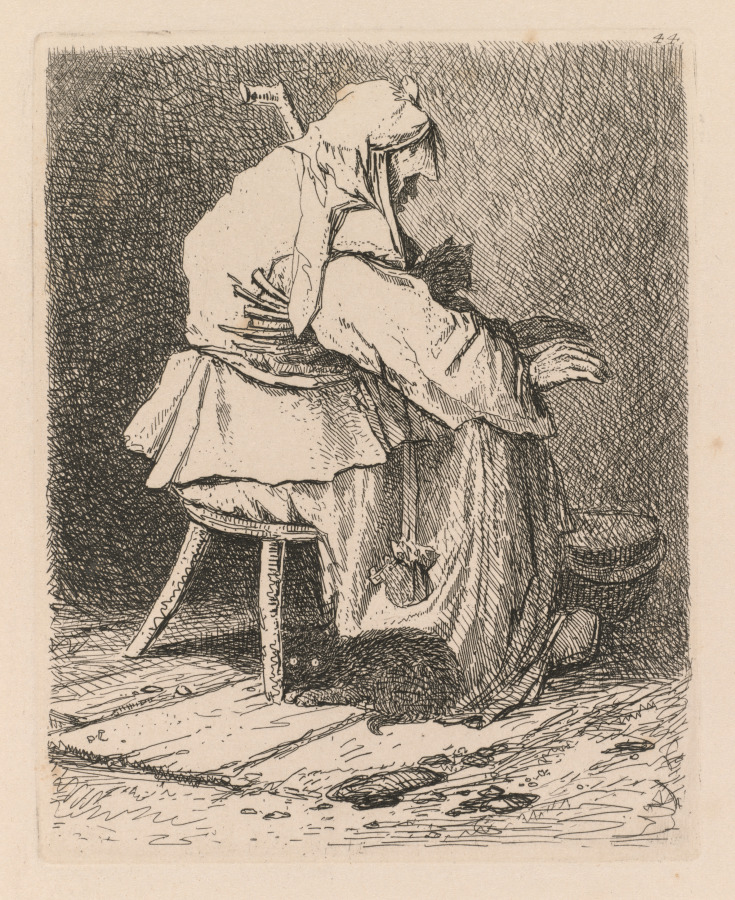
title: Liber Studiorum: Plate 44, Sketch after Rembrandt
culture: England, 19th century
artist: John Sell Cotman (British, 1782–1842)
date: 1838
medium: softground etching, from a bound volume containing 48 plates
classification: Bound Volume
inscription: In plate, within image, upper right: 44